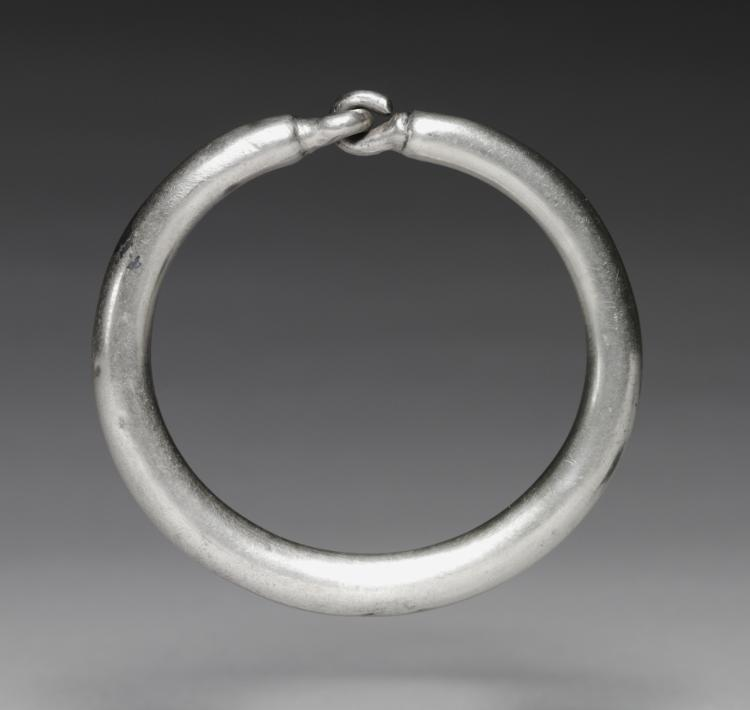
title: Bracelet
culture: Greece, late Hellenistic period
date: 200–1 BCE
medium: silver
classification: Jewelry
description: This bracelet is part of a set of jewelry including a bracelet and a necklace of similar design (1986.181). Torques in antiquity were often paired with matching bracelets, though our set only has one. While in the Thracian and Scythian cultures these torque sets represented elite status, in Greek culture they came to represent non-Greek “barbarians” and were used as stereotypical symbols of non-Greeks.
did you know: This silver bracelet is made from a single piece of metal.